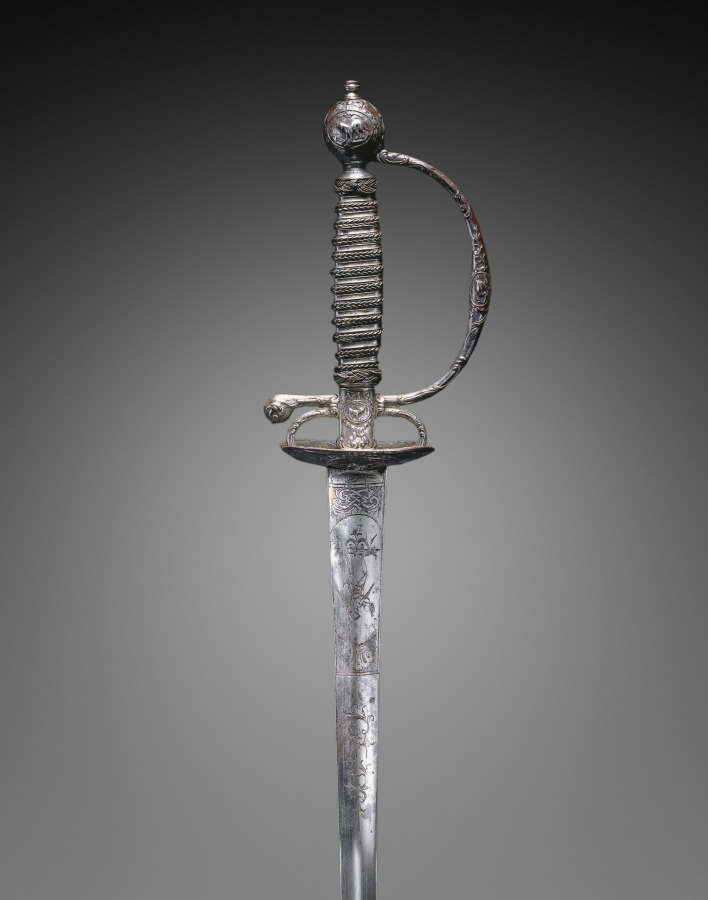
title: Small Sword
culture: France, 18th century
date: c.1770–80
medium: steel; chiseled relief decoration; blade engraved; wire grip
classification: Arms and Armor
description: During the 1700s, the small-sword emerged as a light, quick weapon. Like the rapier it was carried by unarmored civilians, the noblemen of the upper classes. Over time this delicate sword became more an accessory of male attire than a weapon essential to life and death. The sword hilt, which shows even when the blade is sheathed, became the ground for elaborate decoration. These small-swords thus represent the final stage in the evolution of the sword, from the edged weapons of antiquity to the elegantly refined blades of the 1700s and 1800s.